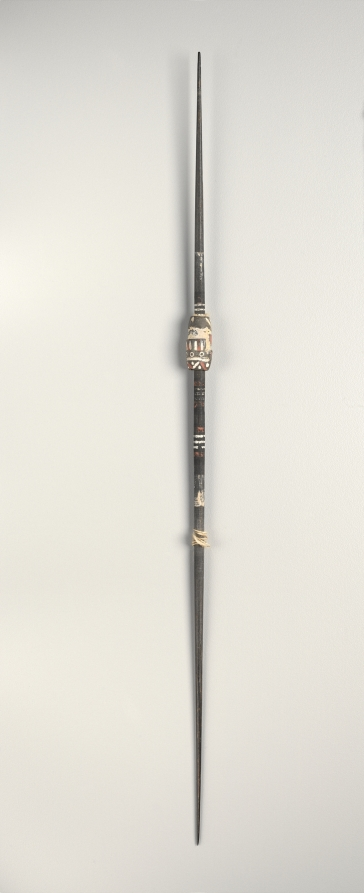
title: Spindle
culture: Peru, South Coast, Nasca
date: c. 1–399 CE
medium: wood with carved clay whorl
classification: Spindle Whorl